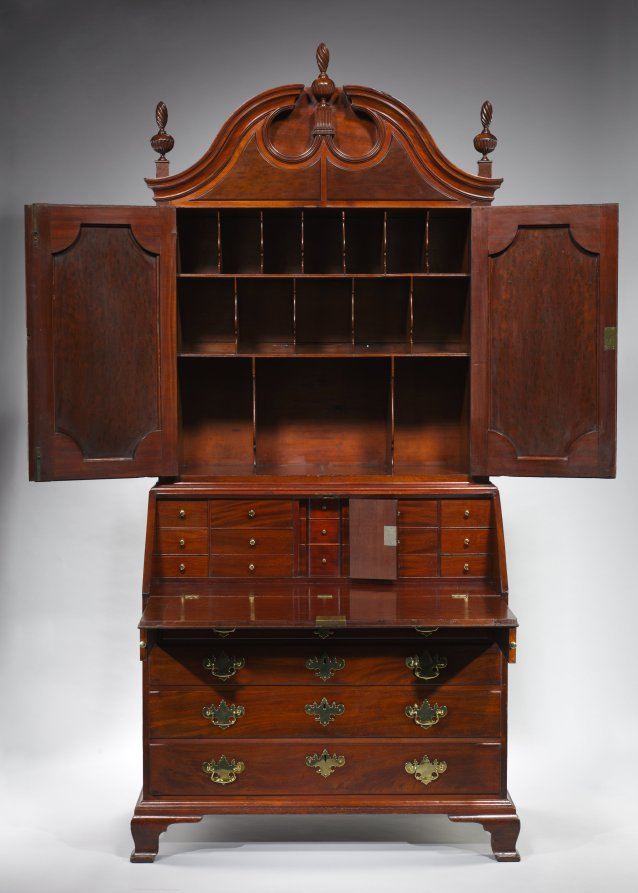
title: Desk and Bookcase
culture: America, Rhode Island, Newport, 18th century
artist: attributed to John Townsend (American, 1732–1809)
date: c. 1780–95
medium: "Plum pudding" mahogany, red cedar, chestnut, white pine, brass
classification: Furniture and woodwork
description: In the 1700s, Newport, Rhode Island, was the fifth largest city in North America and one of the most important centers of shipping and trade along the Eastern Seaboard. Orders for furniture from its celebrated cabinetmakers came in from far and wide. This desk and bookcase was likely made for Oliver Wolcott Sr., a signer of the Declaration of Independence and later governor of the State of Connecticut. Eventually, the desk passed down through his family to Dorothy Draper, an important 20th-century interior decorator, and ultimately to her daughter, Penelope Draper Buchanan, whose husband gave it to the museum after her death—a rare, unbroken line of succession. Large desks were designed to hold all the necessary components of a gentleman’s office under lock and key: books, papers, pens and ink, and important documents. To serve such a function desks also became complicated masterworks of the cabinetmaker’s art, incorporating many parts from small drawers to large panels cut from a single tree, making them among the most expensive types of furniture available. This desk and bookcase exhibits the characteristic traits of classic Newport furniture—“plum pudding” mahogany, cupcake-like finials, and a carved shell on the inside of the desk.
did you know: This desk and bookcase was likely made for Oliver Wolcott Sr., a signer of the Declaration of Independence and later governor of Connecticut.